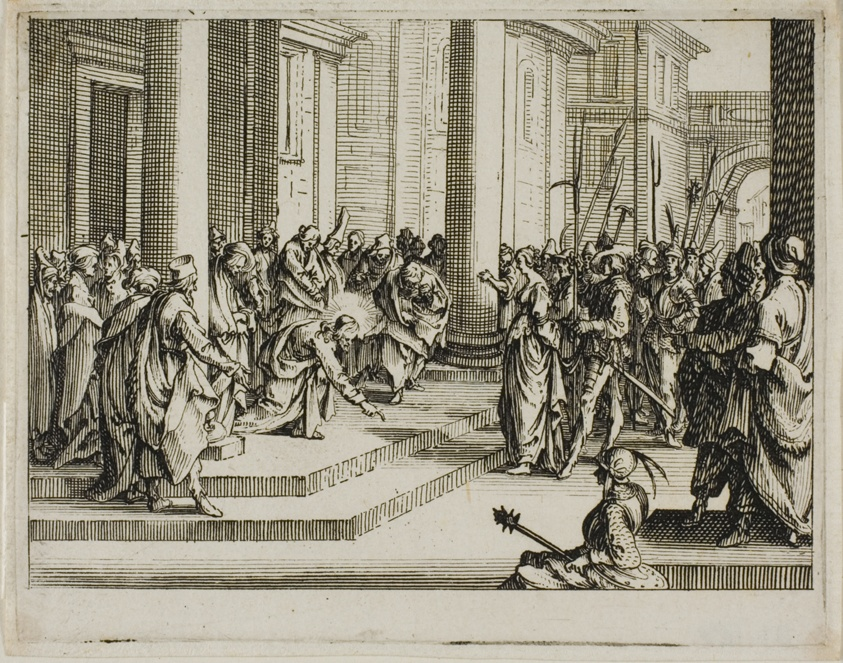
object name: Print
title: Jesus and the Adulterous Woman, from The New Testament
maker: Jacques Callot (French, 1592-1635); published by Israël Henriet (French, 1590-1661)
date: 1635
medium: Etching on paper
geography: France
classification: etching; print; prints and drawing